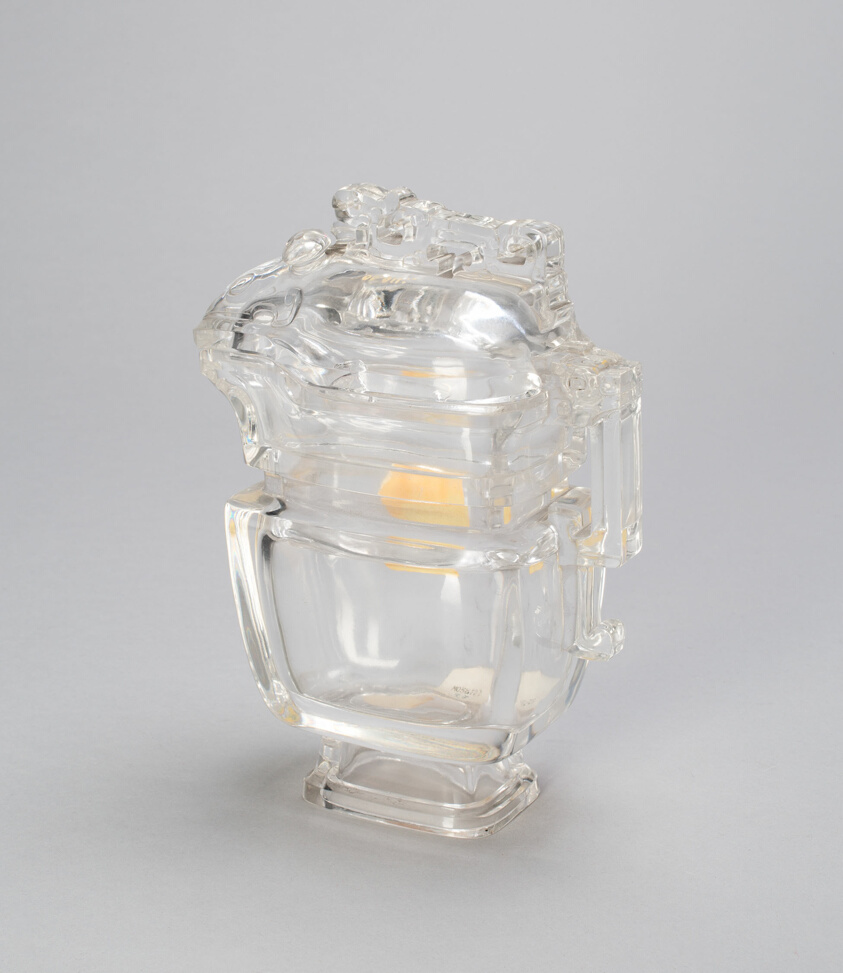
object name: Vessel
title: Handled Vessel in Arhcaistic Style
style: qing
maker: China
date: Qing dynasty (1644–1911), late 18th/early 19th century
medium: Rock crystal with carved decoration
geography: China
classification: vessel; stone; asian art